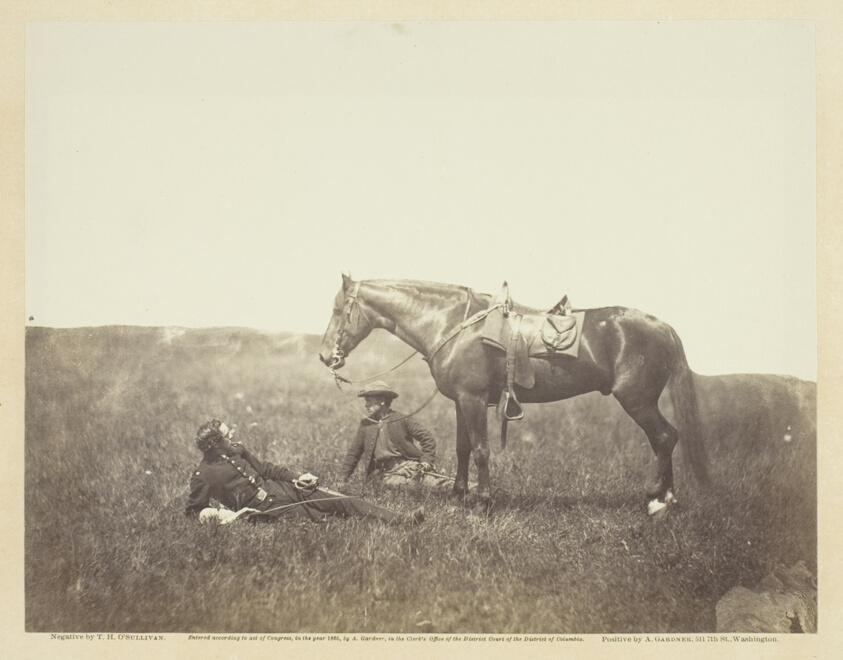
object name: Photograph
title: The Halt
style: 19th century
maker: Timothy O'Sullivan (American, born Ireland, 1840–1882)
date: May 1864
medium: Albumen print, pl. 50 from the album "Gardner's Photographic Sketch Book of the War, vol. 1" (1866)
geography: United States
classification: photograph; albumen silver print; photography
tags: Collected by Hugh Edwards, Gardner's Photographic Sketch Book